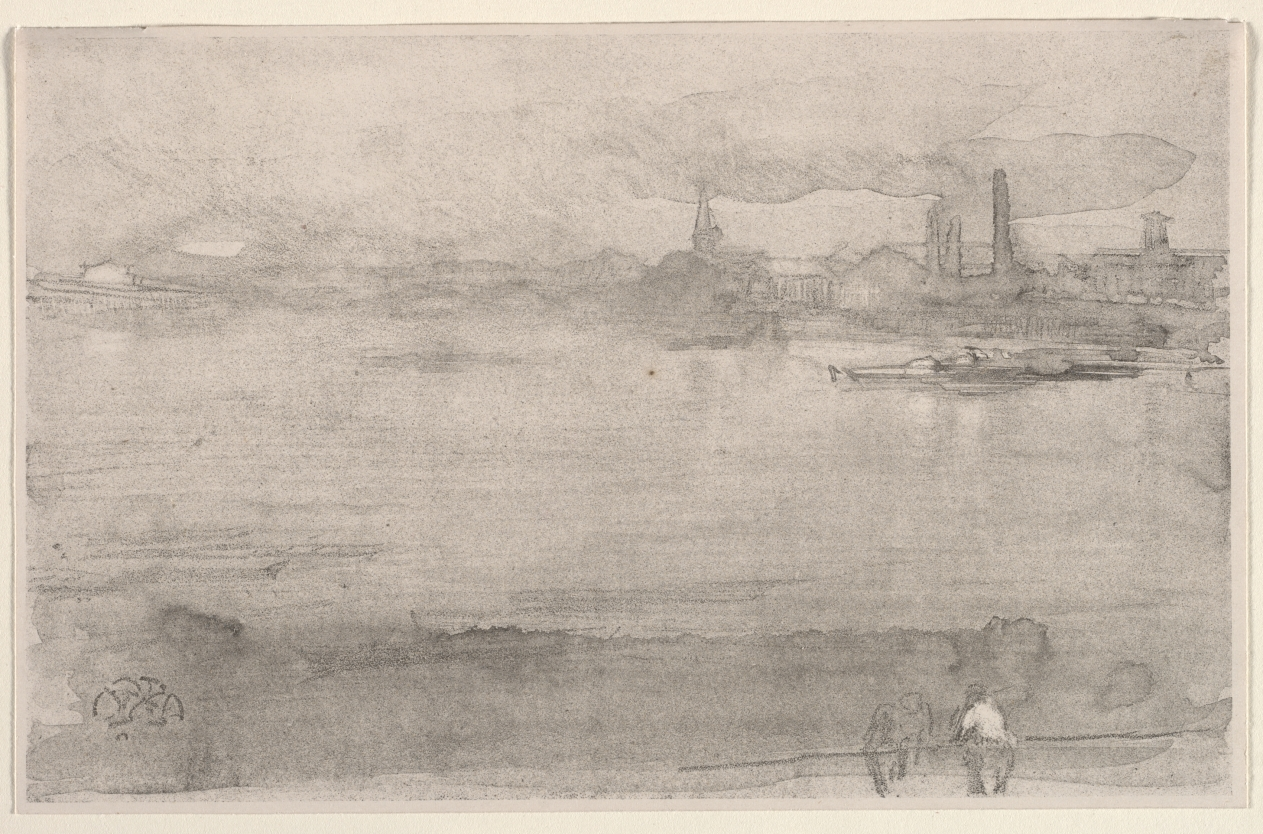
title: Early Morning: The Thames at Battersea, London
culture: America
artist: James McNeill Whistler (American, 1834–1903)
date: 1878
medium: lithograph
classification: Print